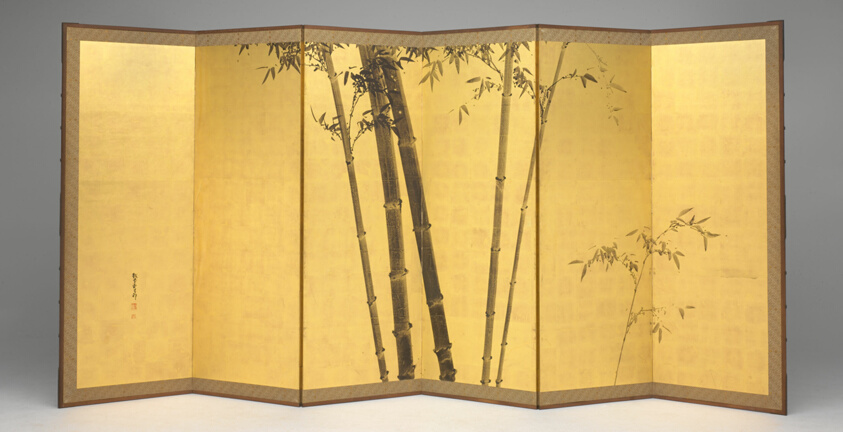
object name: Furniture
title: Bamboo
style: Japanese (culture or style)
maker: Kishi Ganku (Japanese, 1749-1838)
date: Early 19th century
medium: Pair of six-panel screens; ink and gold leaf on paper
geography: Japan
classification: screen; painting; asian art; furniture